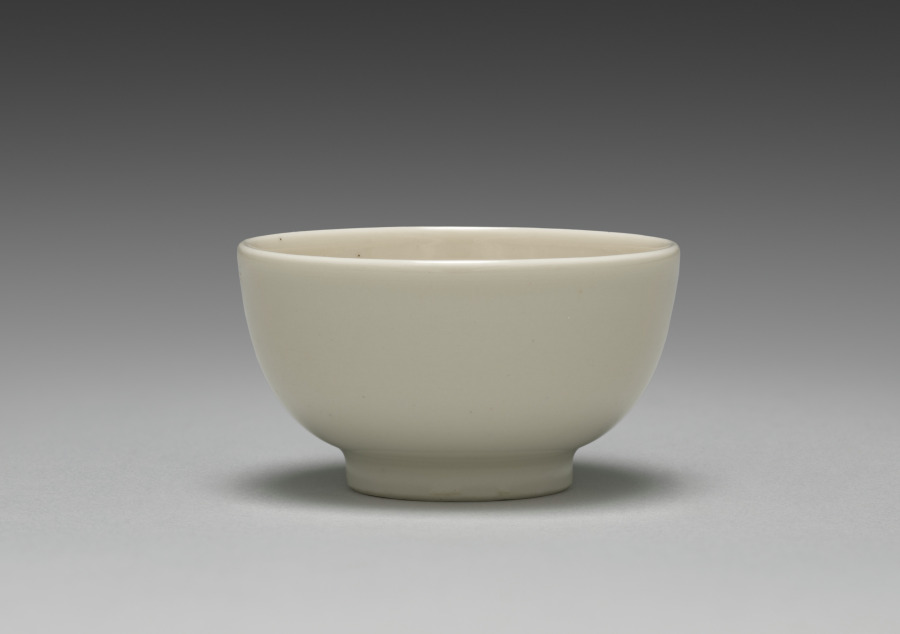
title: Sake Cup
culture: Japan, Meiji period (1868–1912)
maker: Seifū Yohei III (Japanese, 1851–1914)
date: c. 1893–1914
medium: porcelain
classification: Ceramic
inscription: 清風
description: Seifū Yohei III was the first ceramist to be designated an Imperial Household Artist, a position that came with an annuity. He was tasked with producing items need by the imperial household to decorate the Meiji Palace and to present to state guests as gifts.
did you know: There are subtle bamboo leaflike shapes on the interior of the sake cup.